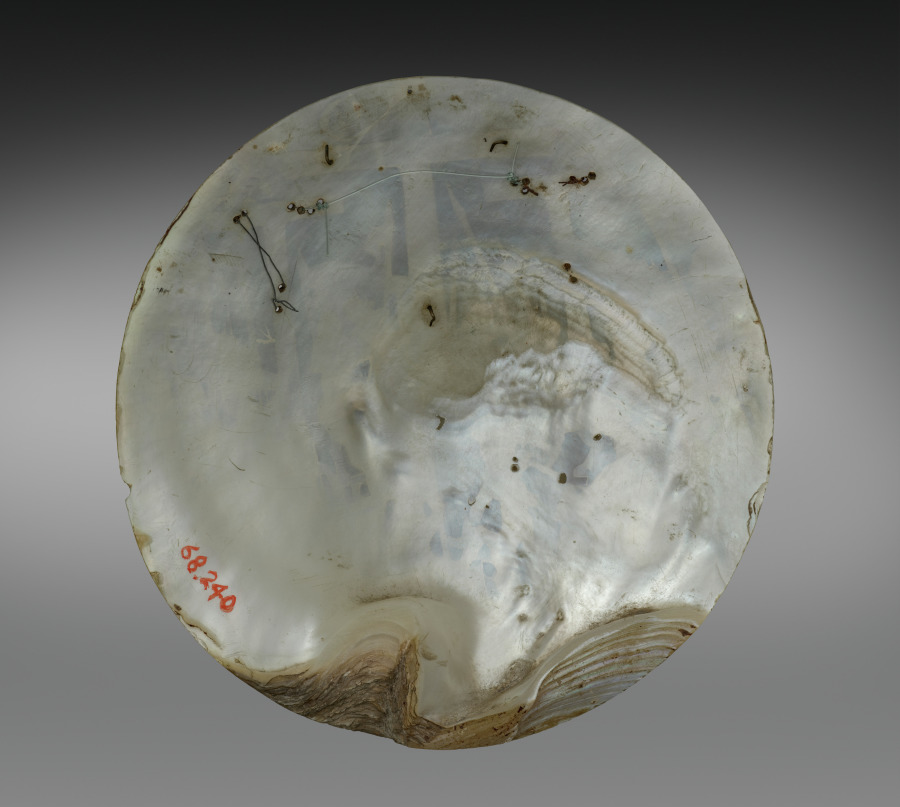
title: Calvary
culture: Germany, Middle Rhine?, 15th century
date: c. 1450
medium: mother-of-pearl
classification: Sculpture